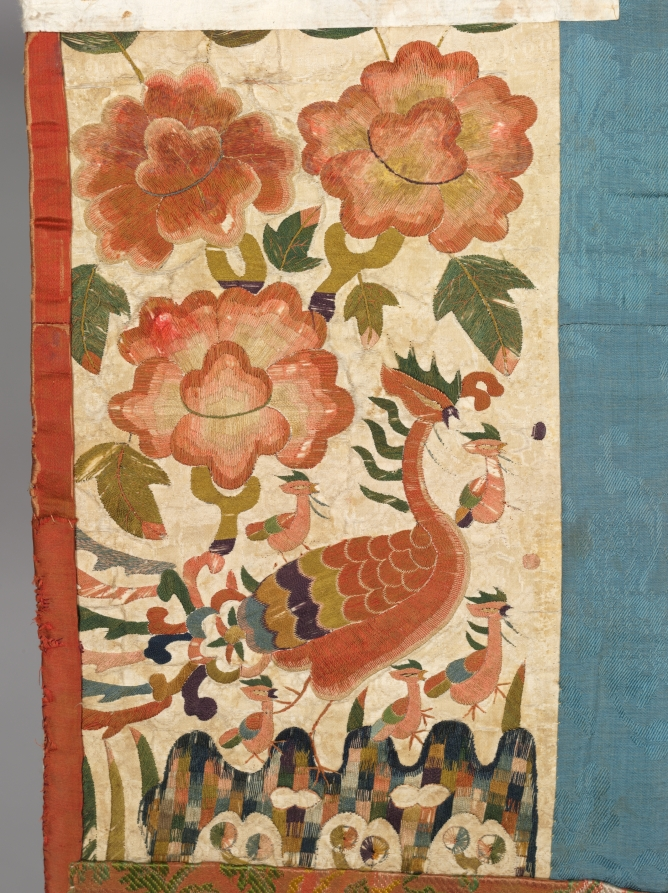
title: Bridal Robe (Hwarot)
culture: Korea, Joseon dynasty (1392–1910)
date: 1850–1910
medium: Satin weave silk; silk embroidery; paper edging on neck and sleeves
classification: Garment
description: This bride's robe is exquisitely embroidered with various symbols of happiness in colorful silk threads. Butterflies stand for marital happiness; the phoenix, numerous offspring; and lotus flowers and white cranes, longevity. Yet, the bridal robe does not attest to the life of luxury. To the contrary, many traces of repairs, trimmings, and patchwork reflect Joseon period women’s commitment to value neo-Confucian aesthetics of frugality and modesty. Substantial repairs and patching reveal that this robe served as an important communal resource to be shared and passed down through several generations. Its collar and sleeves are covered in thick white paper; this paper is replaced with new paper for each bride, while the robe itself was reused for decades.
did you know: This bride's robe was not made for one specific bride, but rather was shared and passed down to many brides.